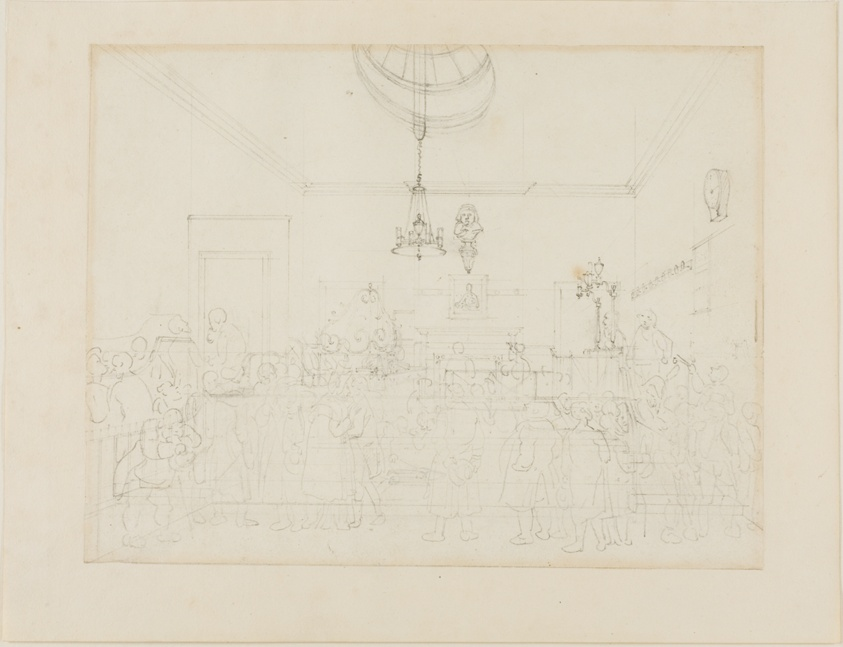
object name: Drawing and Watercolor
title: Study for Bow Street Office, from Microcosm of London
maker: Augustus Charles Pugin (English, born France, 1762-1832); Thomas Rowlandson (English, 1756-1827)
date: c. 1808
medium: Graphite on ivory wove paper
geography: England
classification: graphite; drawings (visual works); prints and drawing